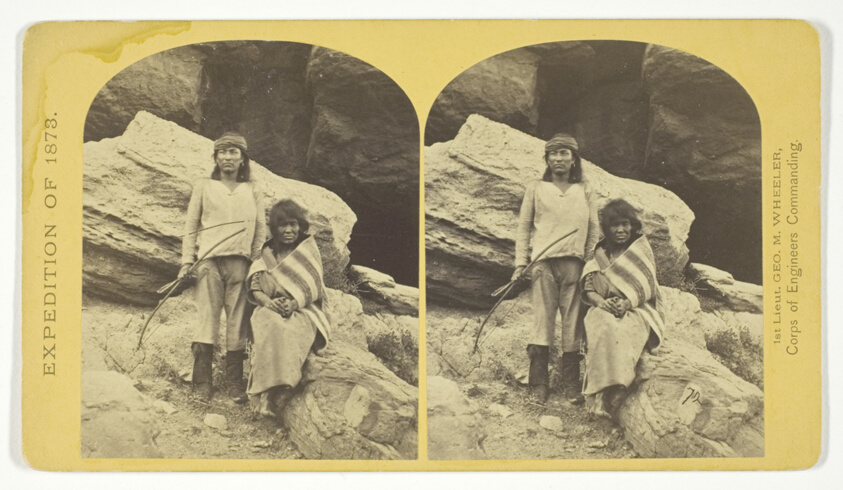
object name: Photograph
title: Navajo Brave and his Mother. The Navajo were formerly a warlike tribe until subdued by U.S. Troops, in 1859-60. Many of them now have fine flocks, and herds of horses, sheeps and goats, No. 29 from the series "Geographical Explorations and Surveys West of the 100th Meridian"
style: 19th century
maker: Timothy O'Sullivan (American, born Ireland, 1840–1882); commissioned by George Wheeler for the War Department, Corps of Engineers, U.S. Army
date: 1873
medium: Albumen print, stereo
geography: United States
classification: stereograph (albumen); photography; photograph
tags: Collected by Hugh Edwards, mothers, sons, Geographical Explorations and Surveys